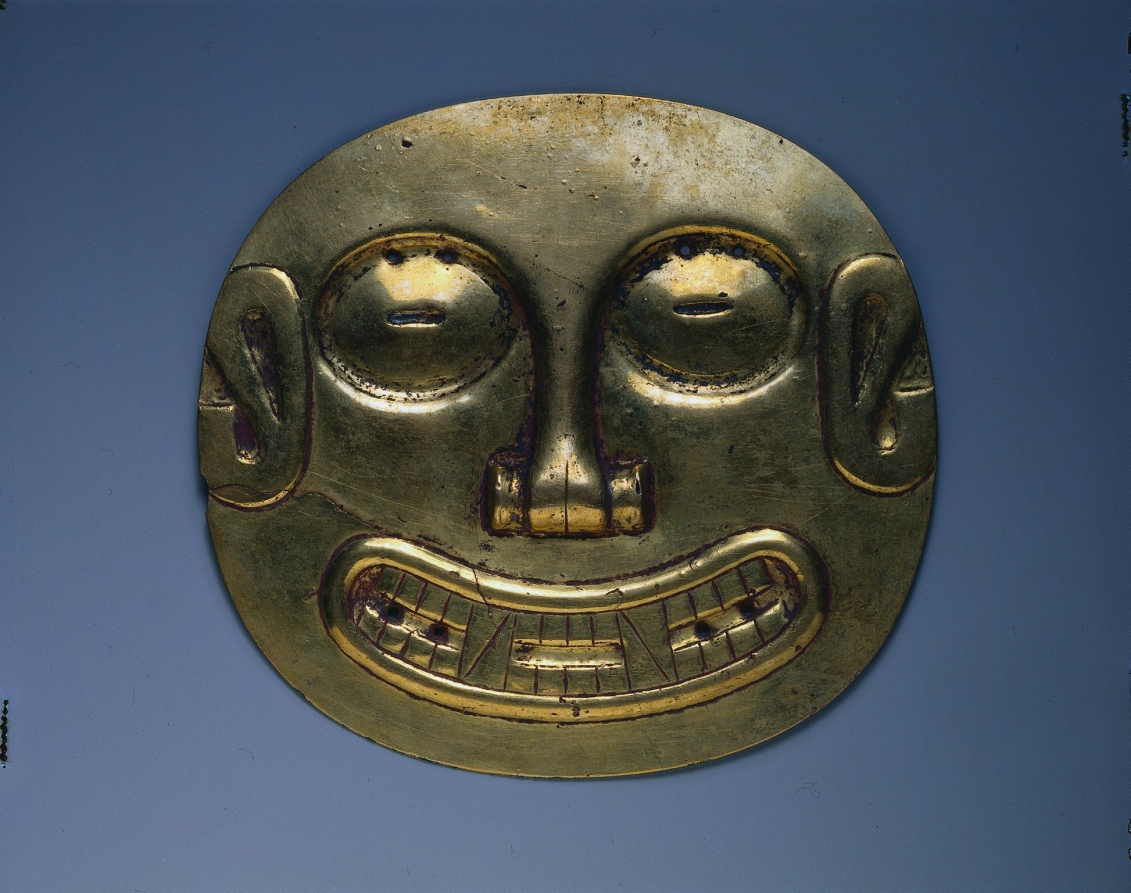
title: Ornament from Sitio Conte: Small Plaque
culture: Panama, Conte style, 5th - 10th century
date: c. 400–500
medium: hammered gold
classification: Metalwork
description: Harvard archaeologists excavated this and seven other ornaments from several burials at Sitio Conte, a cemetery famous for its lavish graves of powerful chieftains. The young man buried in Grave 26 was such a chief. His status was stunningly memorialized by 21 human companions and 475 objects, many of them personal ornaments made of gold, including this large chest plaque and a rod-shaped ear ornament. The creature on the chest plaque, found close to the chief’s body, has reptile claws and perhaps the head crest of an iguana. Its meaning is unknown but perhaps, as in later periods, reptilian imagery and the warm gleam of gold linked rulers with the sun’s creative force.